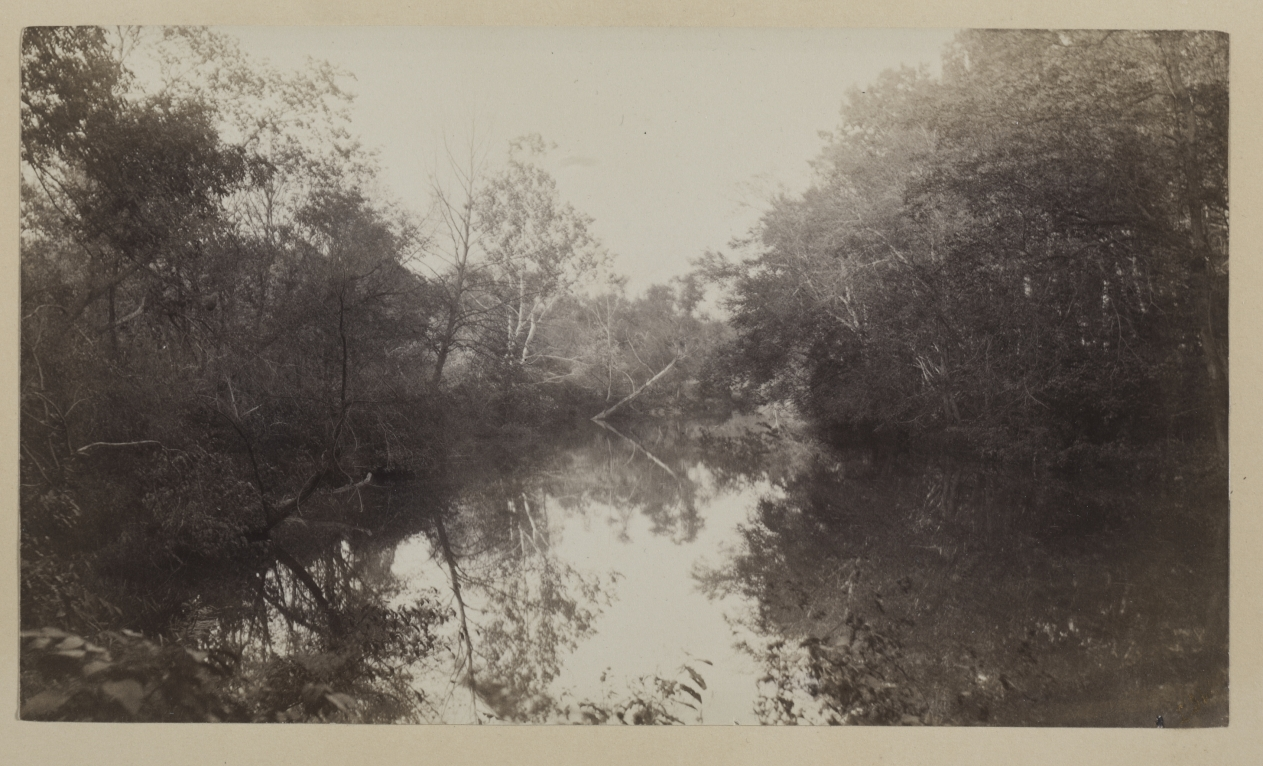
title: Avondale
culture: America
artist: Louise Deshong Woodbridge (American, 1848–1925)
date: c. 1885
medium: albumen print from glass negative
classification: Photograph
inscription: in graphite, on recto: "Avondale"; initialed in gold pigment: "LDW"